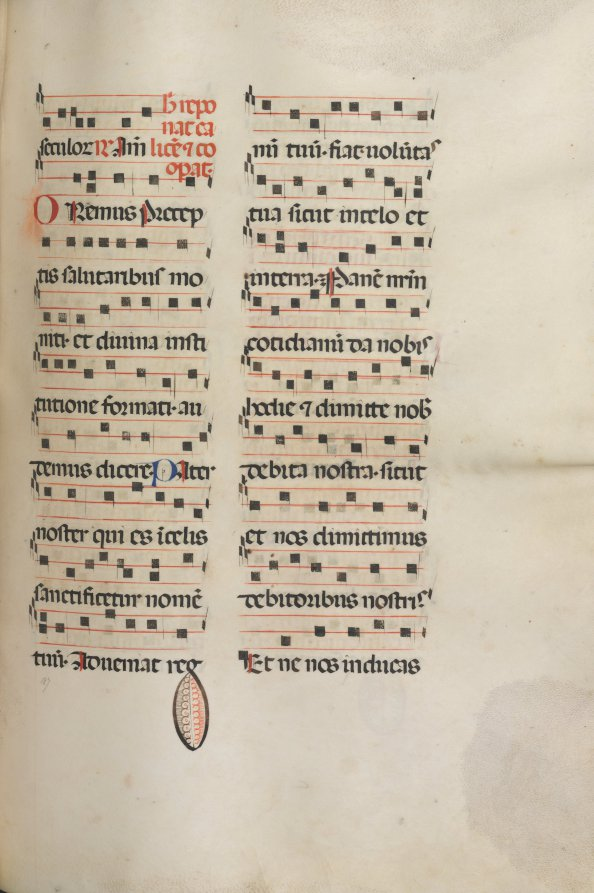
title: Missale: Fol. 189: Music for various prayers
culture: Italy, Perugia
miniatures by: Bartolommeo Caporali (Italian, c. 1420–1503)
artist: assisted by Giapeco Caporali (Italian, d. 1478)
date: 1469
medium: ink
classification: Bound Volume